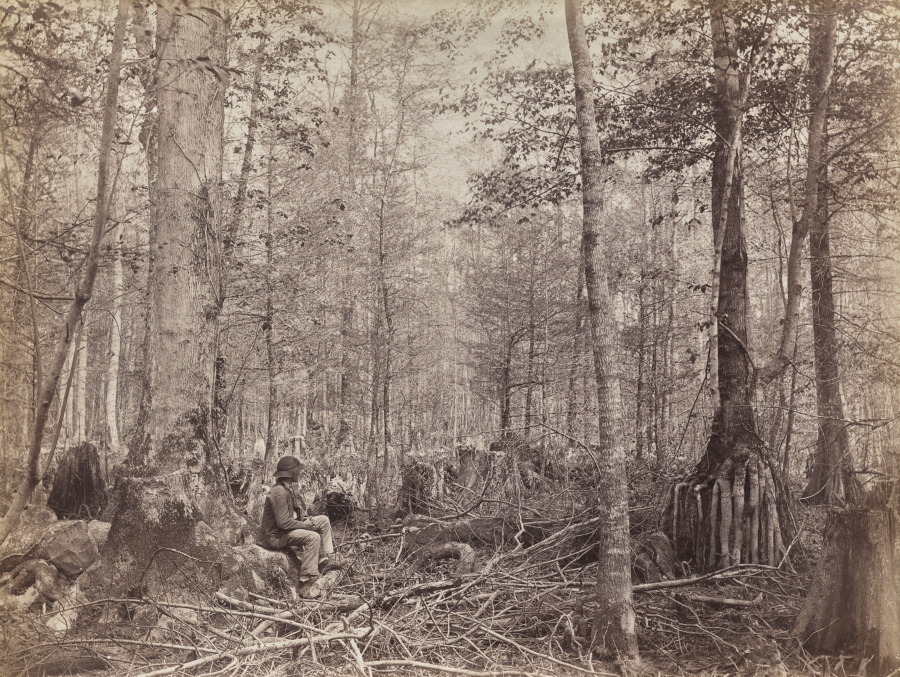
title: Great Dismal Swamp, Virginia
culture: America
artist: Israel Cook Russell (American, 1852–1906)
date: c. 1872–90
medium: albumen print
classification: Photograph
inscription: Handwritten in graphite on verso of photograph and mat: "C.H. Merriam, attrib.; Dismal Swamp, NC, c. 1880 (?); GE 1890.6; 173"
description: Israel Cook Russell’s view of the Great Dismal Swamp, which straddles the border between Virginia and North Carolina, evokes both the locale’s abundance of timber and its sense of desolation. Russell, a celebrated geologist, took care to express the geological and biological forces that shaped landscapes but also to create images of artistic value.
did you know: From the 1700s through the Civil War, the Great Dismal Swamp’s timber was harvested by slave labor, yet the swamp also housed numerous people who had escaped slavery.